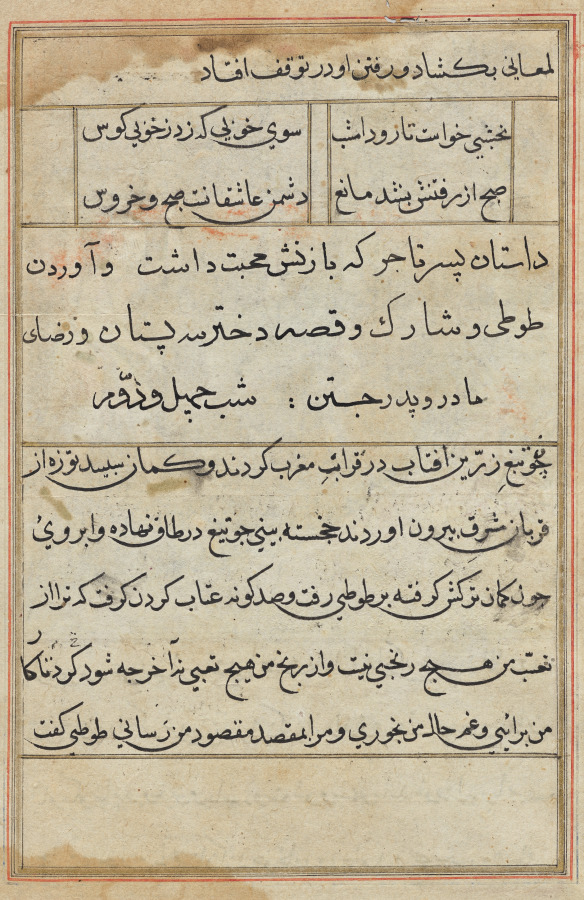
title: Page from Tales of a Parrot (Tuti-nama): text page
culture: Mughal India, court of Akbar (reigned 1556–1605)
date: c. 1560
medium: gum tempera, ink, and gold on paper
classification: Painting